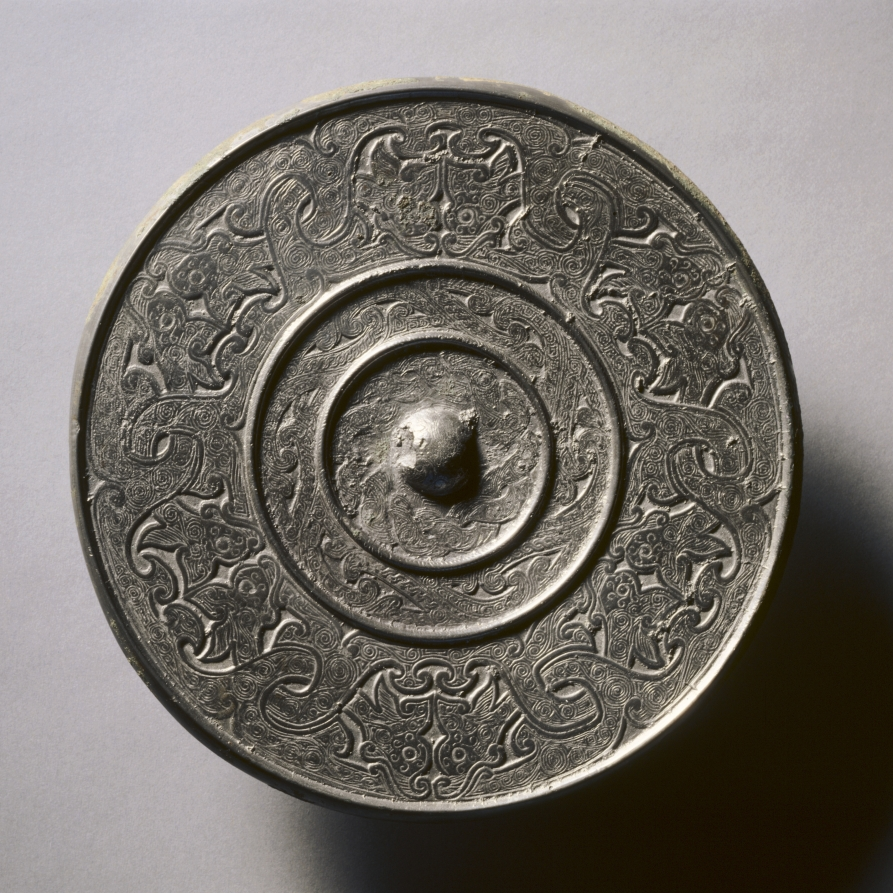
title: Mirror with Interlacing Dragons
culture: China, Tang dynasty (618-907)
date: early 600s-early 900s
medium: bronze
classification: Metalwork